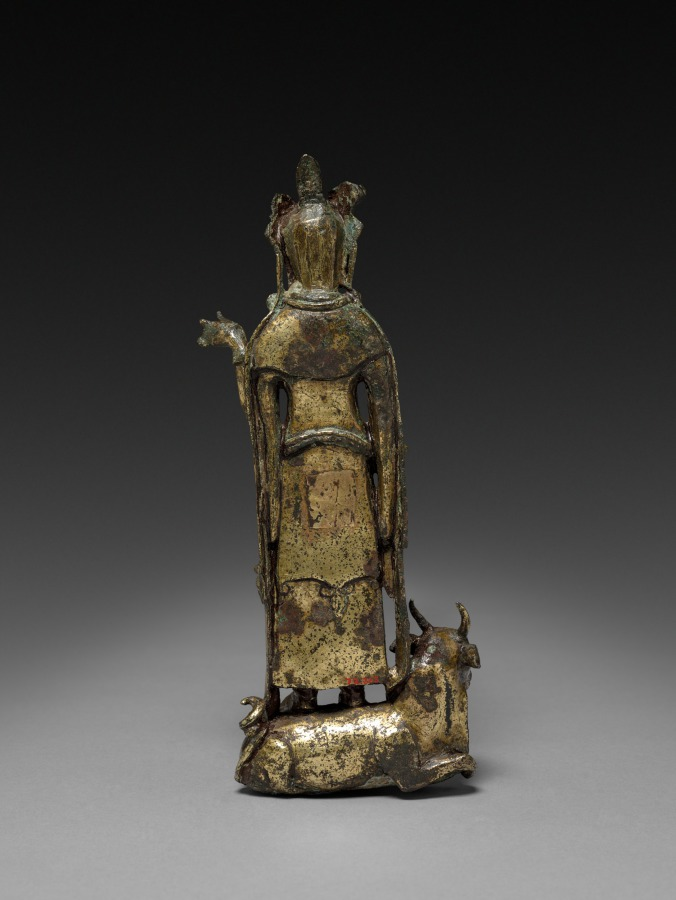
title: Maheshvara (Shiva) Standing on a Bull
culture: China, Six Dynasties period (317-581), Northern Qi dynasty (550-577)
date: Six Dynasties Period (317–581), Northern Qi Dynasty (550–577)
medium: gilt bronze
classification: Sculpture